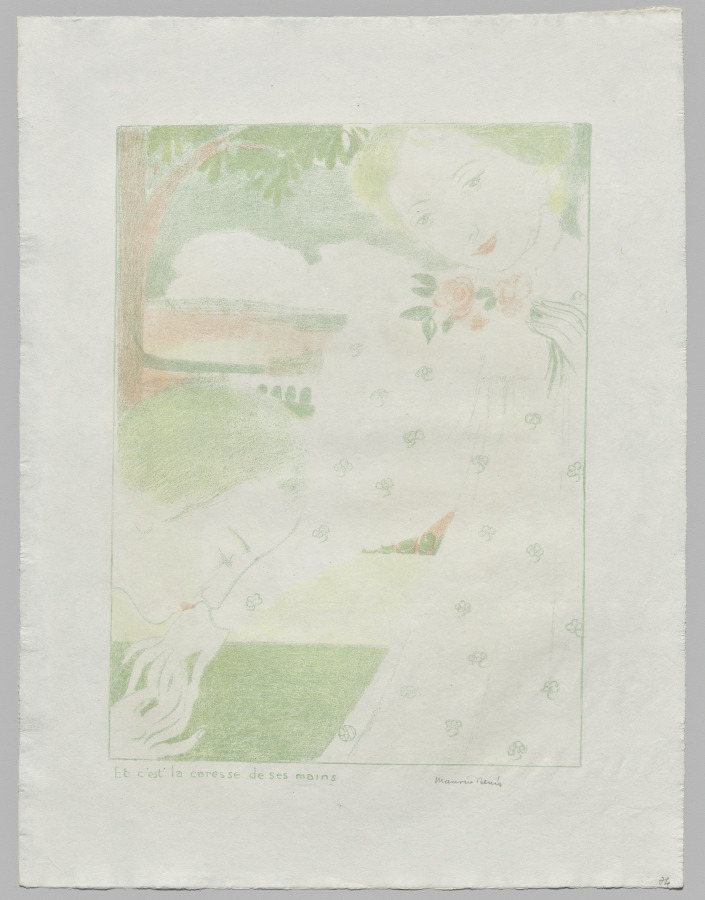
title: And It Is the Caress of Her Hands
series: Love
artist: Maurice Denis (French, 1870–1943)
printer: August Clot (French, 1858–1936)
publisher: Ambroise Vollard (French, 1867–1939)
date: 1899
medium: color lithograph on wove paper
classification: Print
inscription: Recto, lower left: “Et c’est la caresse de ses mains”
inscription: In graphite, recto, lower right: “Maurice Denis (signed)”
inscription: In graphite, recto, lower right: [illegible number]”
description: Maurice Denis belonged to the Nabis, a group of artists who came together in 1889 to pursue a radical new style informed by subjective experience and emotion. This print is from a series in which Denis explored his devotion to his wife, Marthe, by depicting her in a variety of settings alongside titles drawn from his own journal. The vague but evocative images were meant to encourage the viewer to draw connections to the theme and meditate on its meaning.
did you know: Maurice Denis was a devout Catholic and often drew visual connections between his wife, Marthe, the subject of this print series, and the Virgin Mary.